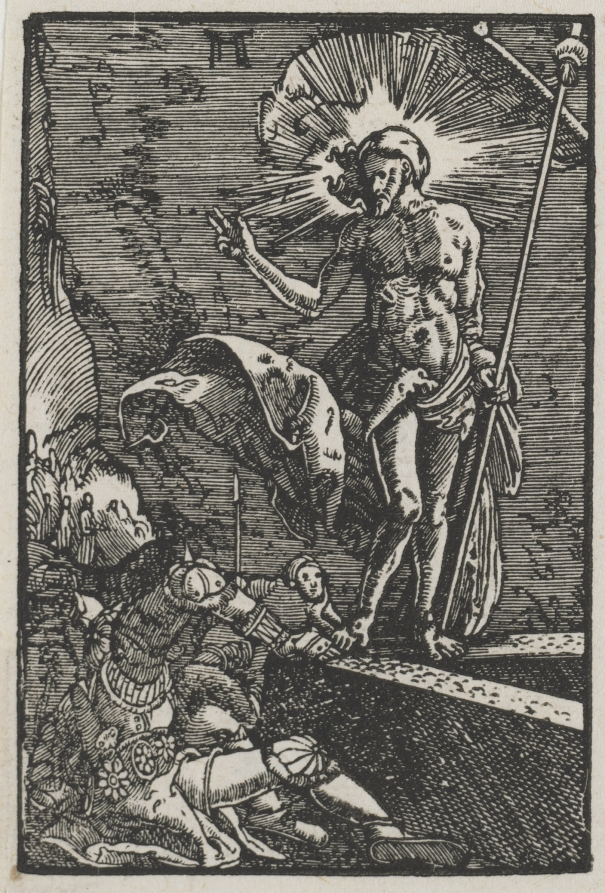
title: The Fall and Redemption of Man: The Resurrection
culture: Germany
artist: Albrecht Altdorfer (German, c. 1480–1538)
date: c. 1515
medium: woodcut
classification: Print